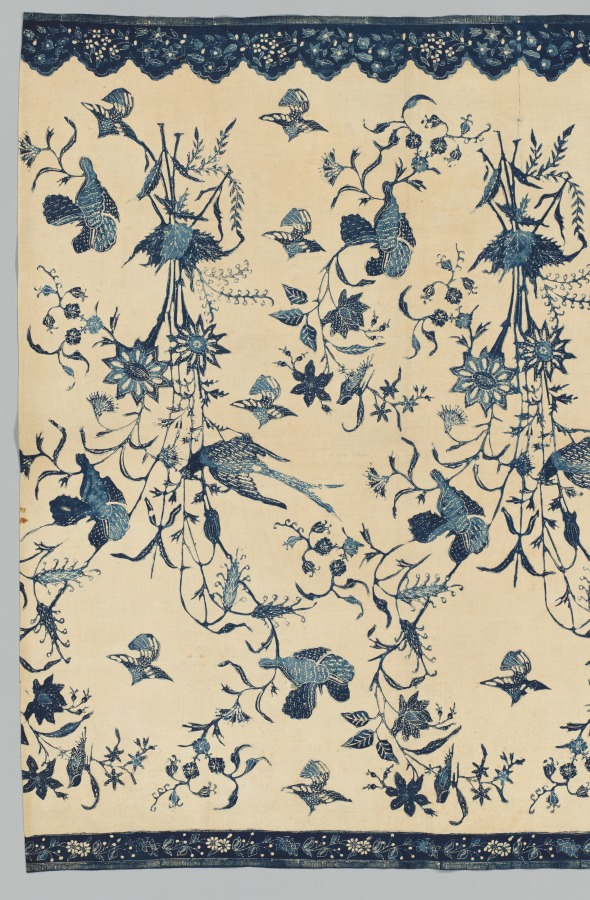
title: Sarong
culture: Indonesia, Java, North Coast, Indramaju ?, early 20th century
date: early 1900s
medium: batik; cotton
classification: Textile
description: Batiks made along the northern coast of Java were influenced not only by Chinese motifs and designs but also European, as a result of the Dutch presence in Indonesia from the sixteenth to the twentieth centuries. In this sarong, European influence is clearly evident in the sprays of flowers and types of birds represented. Batiks dyed only in indigo were a specialty of Indramaju. Shading and contrast are skillfully achieved through different intensities of blue, through the character and thickness of line, and by the use of tiny dots.